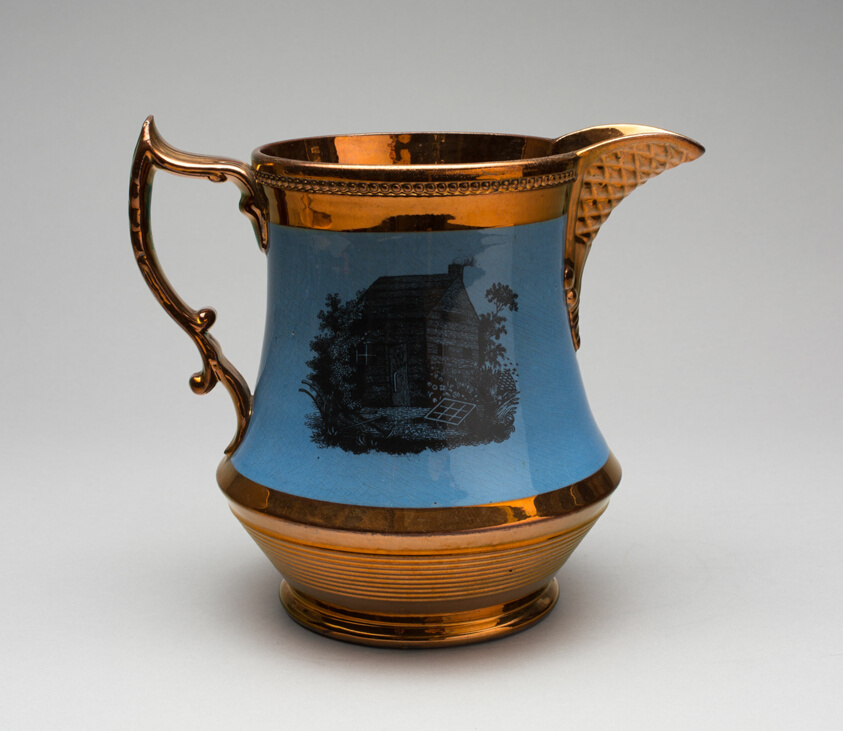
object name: Decorative Arts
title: Pitcher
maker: Artist unknown (American, 19th century)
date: c. 1850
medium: Earthenware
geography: United States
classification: pitcher (vessel); earthenware; vessel; american decorative arts; ceramics; decorative arts